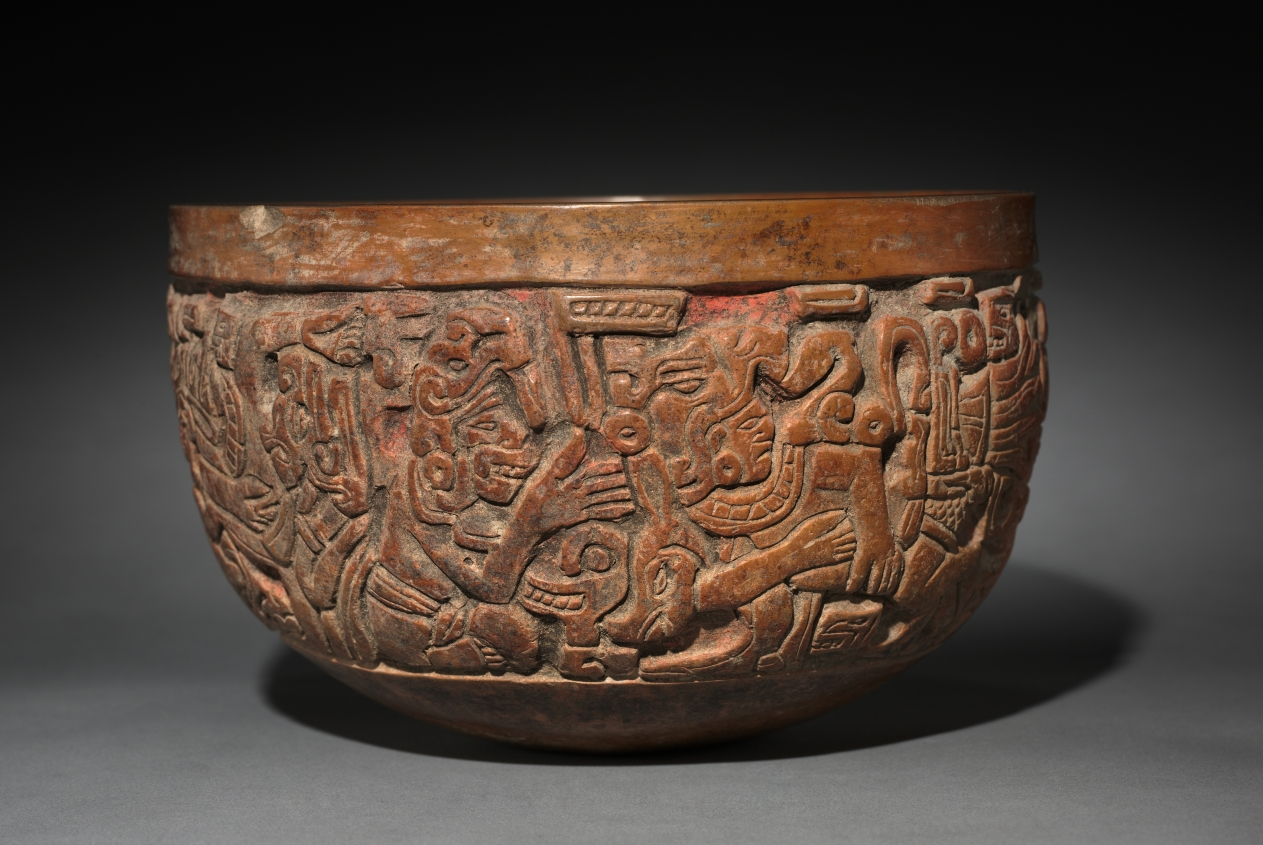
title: Bowl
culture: Mexico, South-central Veracruz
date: c. 500–1000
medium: molded, carved, and burnished pottery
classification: Sculpture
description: This mold-made ceramic bowl is decorated with a band of figures depicted in low relief. Most wear masks or grotesque headdresses, and four seem to struggle with deer. The meaning of the scene, which may be drawn from myth, is unknown.